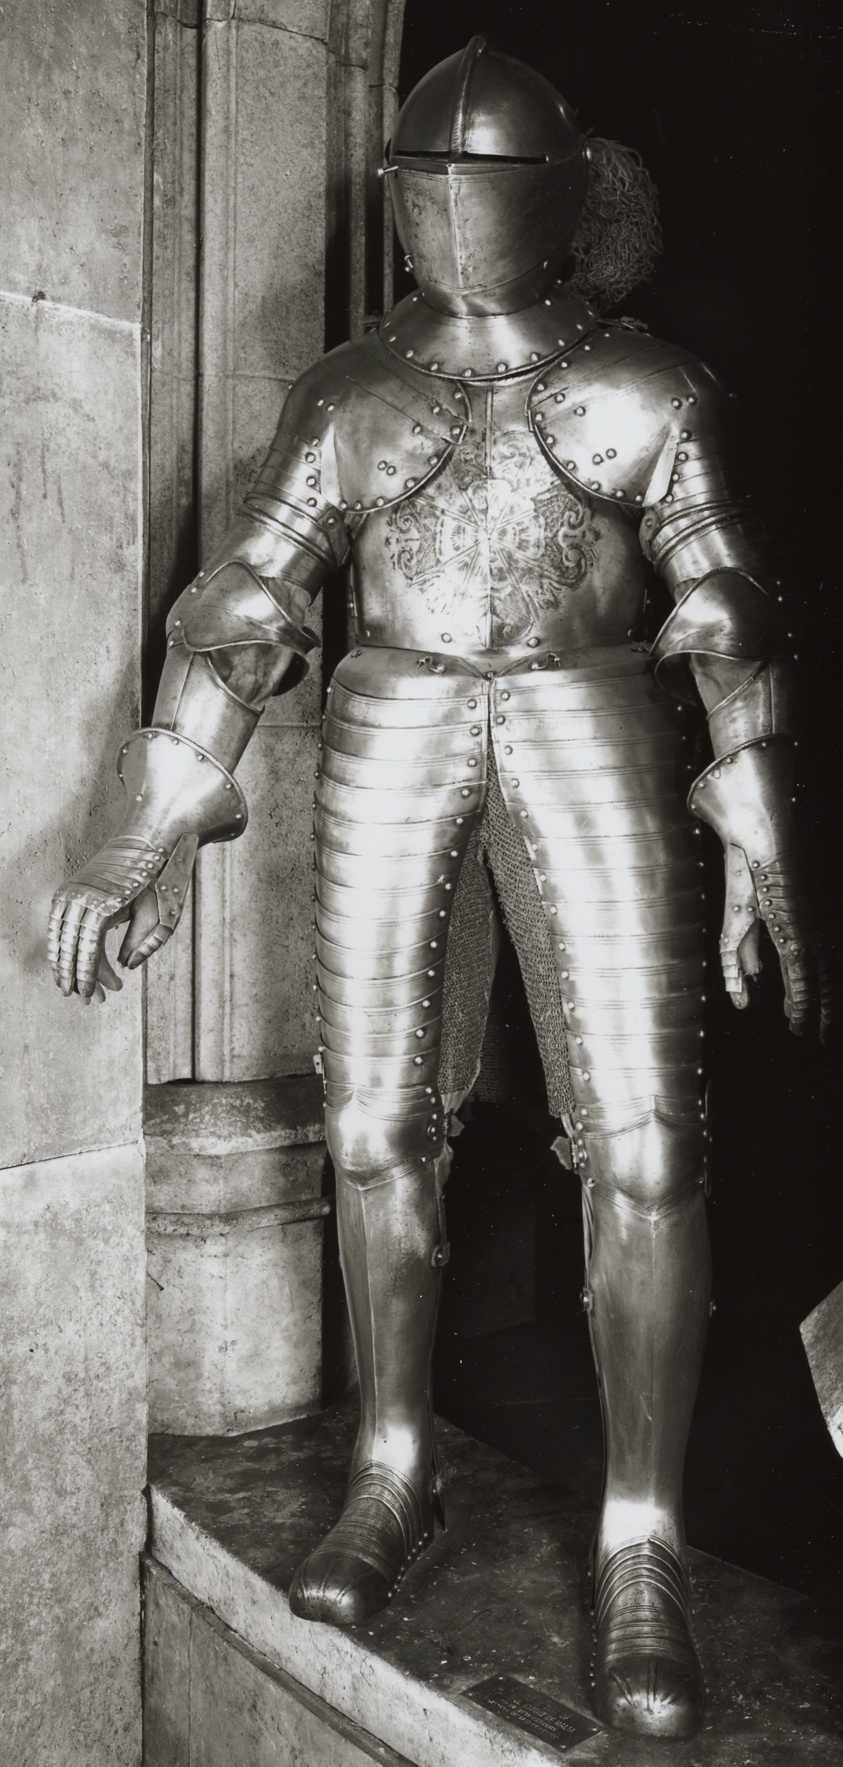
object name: Armor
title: Composite Armor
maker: Italian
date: c. 1610/20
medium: Steel with gilding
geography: Italy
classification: suit; armor; arms and armor